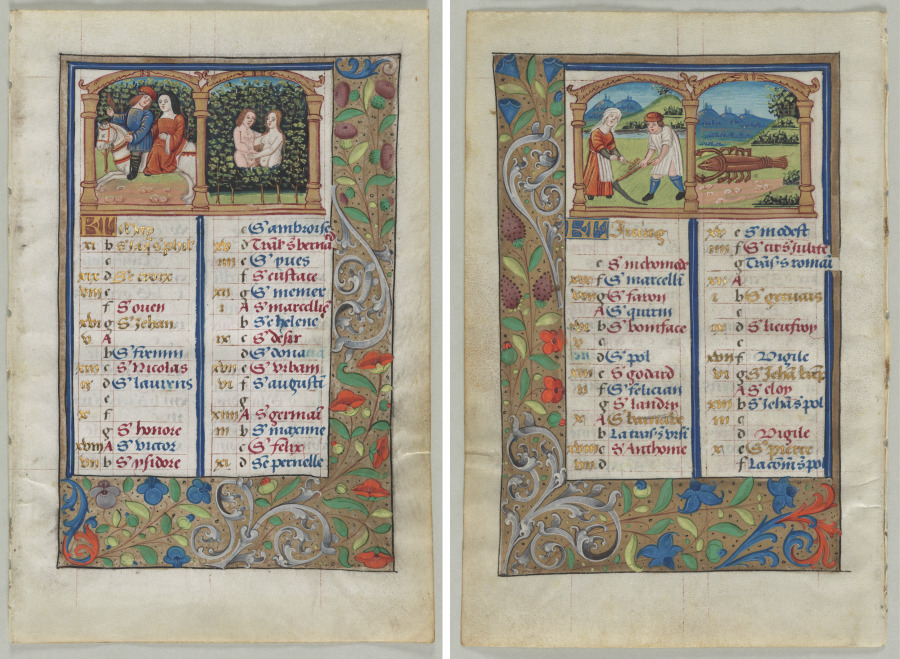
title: Leaf from a Book of Hours: Calendar Page for May (recto) and Calendar Page for June (verso) (2 of 3 Excised Leaves)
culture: France, Rouen, 16th century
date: c. 1510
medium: ink, tempera, and liquid gold on vellum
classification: Manuscript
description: The calendar is usually located at the beginning of a book of hours. Much like calendars today, those in books of hours mark important days to be acknowledged throughout the year. These calendars are perpetual calendars, meaning adjustable, as to be accurate every year. Months are often illuminated with an image of the type of labor or zodiac sign associated with them, such as grapes in September, the month in which they were harvested. In more lavish books, the most important days are done in gold, red, or blue, while lesser days are in brown or black ink. Running along each column are letters, which would have helped readers quickly identify Sundays. Every year, a different letter would indicate Sundays. Also running along the page are golden numbers, roman numerals used to indicate full and new moons and help identify holidays like Easter that do not fall on the same date yearly.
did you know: It is believed that medieval men and women read their books of hours aloud, not silently.